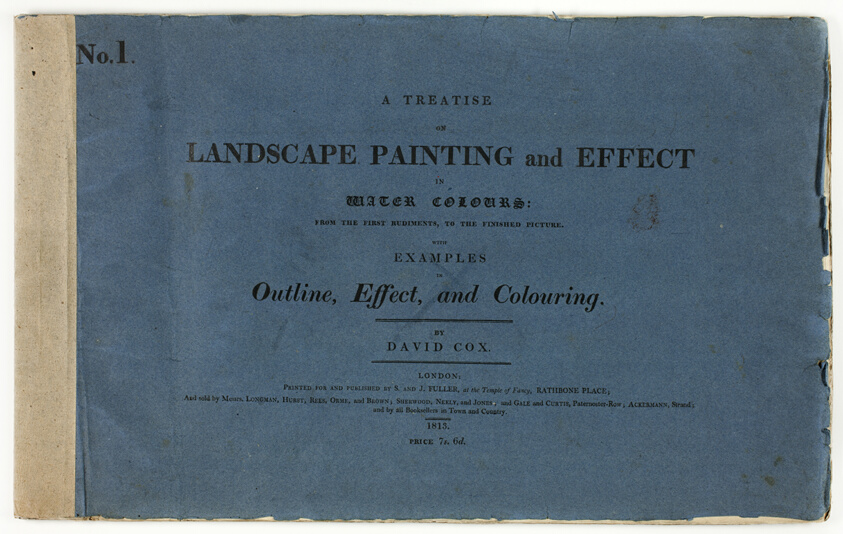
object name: Book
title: A Treatise on Landscape Painting and Effect in Water Colours: From the First Rudiments, to the Finished Picture No. 1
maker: David Cox, the elder (English, 1783-1859); published by S. and J. Fuller (English, 19th century)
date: 1813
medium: Book with six etchings and letterpress in black on cream wove paper, in box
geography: England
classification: watercolor; book; prints and drawing